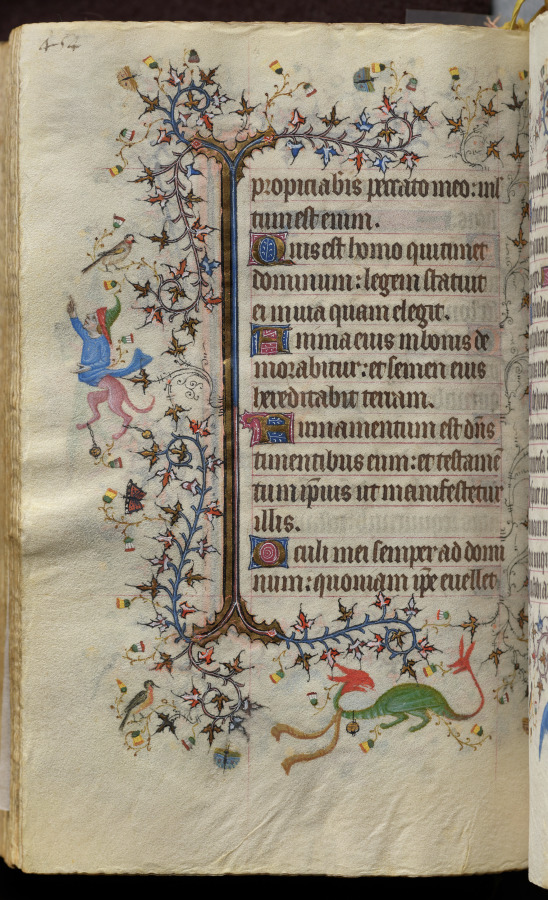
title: Hours of Charles the Noble, King of Navarre (1361-1425): fol. 221v, Text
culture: France, Paris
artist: Master of the Brussels Initials and Associates (French)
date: c. 1405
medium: ink, tempera, and gold on vellum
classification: Bound Volume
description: This precious volume was obviously highly prized by its owner, the French-born King of Navarre, who had his coat of arms painted on no less than twenty folios. Rather than directly commissioning this manuscript from a specific workshop, it seems that Charles the Noble acquired his book of hours -- perhaps ready-made for the luxury market -- while on a trip to Paris in 1404-05. A collaborative effort, six painting styles are evidenced within the pages of this codex, those of two Italians, two Frenchmen, and two Netherlanders. The painter who was responsible for the planning and decoration of the book, and who produced seventeen of the large miniatures, was a Bolognese artist known as the Master of the Brussels Initials. His principal assistant, responsible for most of the borders, was a Florentine who signed his name "Zecho" da Firenze on folio 208 verso.